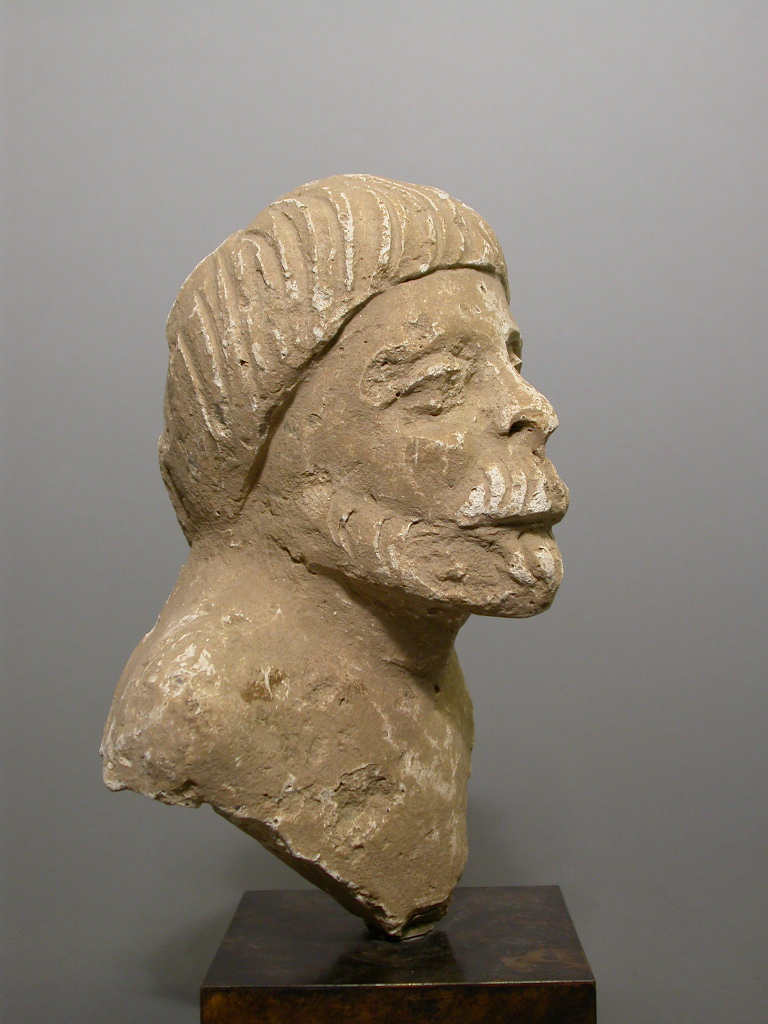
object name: Sculpture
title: Male Head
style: South Asian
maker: Afghanistan or Pakistan; Ancient region of Gandhara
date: 2nd/3rd century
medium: Stucco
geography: Gandhara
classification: bust/head; stuccowork; sculpture; asian art